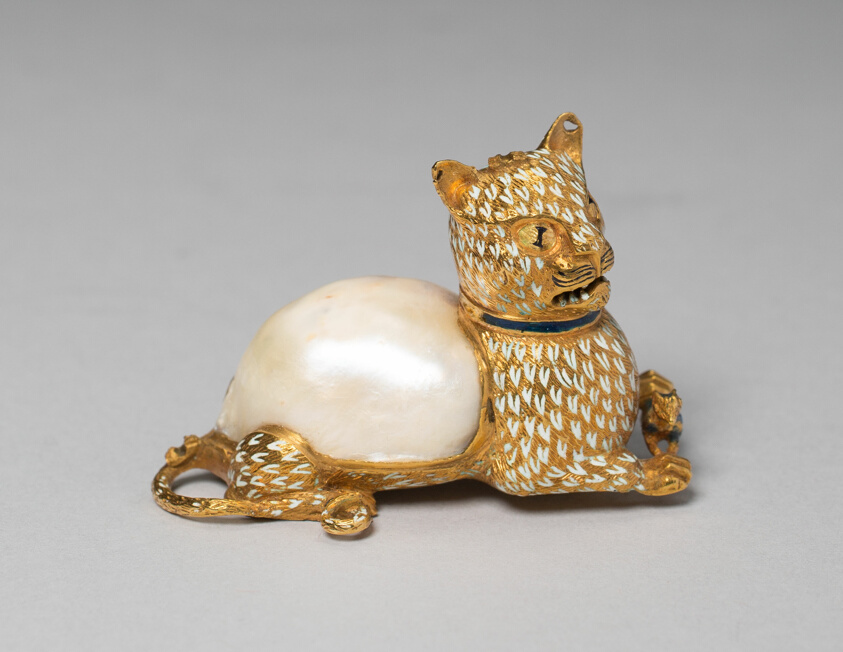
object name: Costume and Accessories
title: Baroque Pearl Mounted as a Cat Holding a Mouse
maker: Spanish or south German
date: 17th century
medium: Gold, enamel, and baroque pearl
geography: Spain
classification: jewelry; european decorative arts; costume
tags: cats, animals